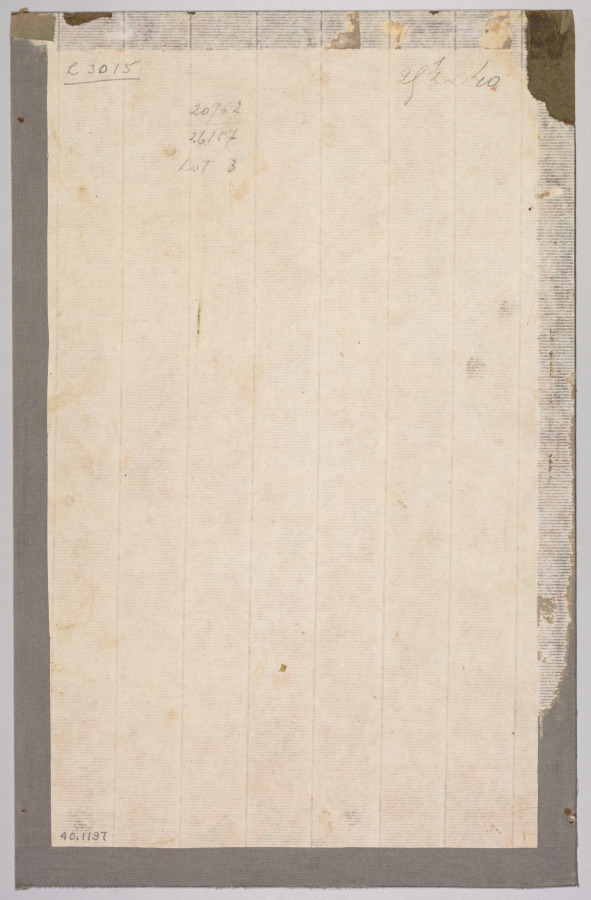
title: Princes hunting in a rocky landscape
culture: India, Mughal, 16th century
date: c. 1580–85; borders added c. 1700s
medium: Ink, slight color, and gold on paper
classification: Painting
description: The subdued palette of this tinted drawing belies the dire events of the scene. A group of Mughal nobles out hunting with falcons has chanced upon two lions in the wilderness, and one of the men has been attacked. The bearded figure with the falcon at the upper left and the huntsman about to retrieve a duck caught by one of the trained falcons at the lower left are reminiscent of an earlier work, Hunting with Falcons in a Landscape (CMA 2013.292), painted by a Persian artist. By the time this painting was made Akbar exerted more direct influence on his artists’ work, and it reveals his taste for dramatic action and climactic moments where life and death hang in the balance.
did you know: A hunter with gunpowder pouch hurriedly loads a musket with a scouring stick.